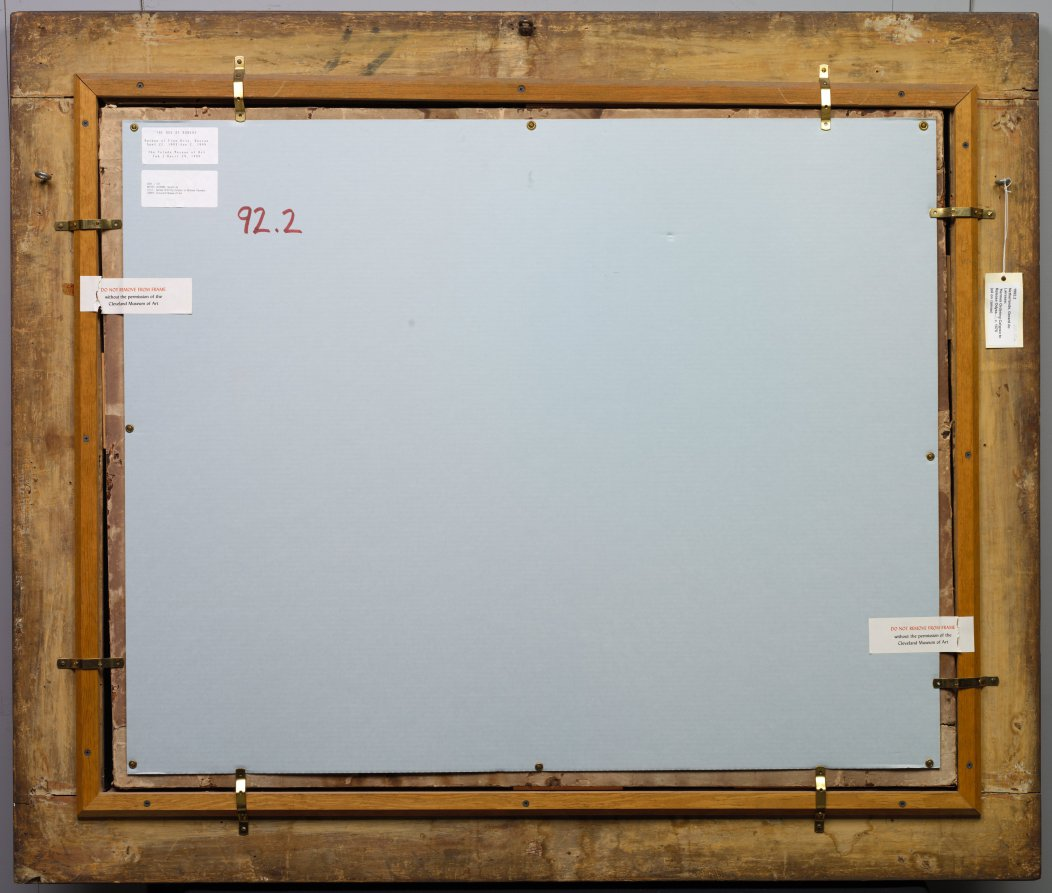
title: Hermes Ordering Calypso to Release Odysseus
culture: Netherlands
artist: Gerard de Lairesse (Flemish, 1641–1711)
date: c. 1670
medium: oil on canvas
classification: Painting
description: The Greek goddess Calypso held the hero Odysseus captive for seven years, preventing his return home from the Trojan War. Despite Calypso’s charms and the luxurious surroundings, Odysseus longed for his home and family, so the Olympian gods finally allowed his freedom. Here, the god Hermes swoops down to free Odysseus from Calypso’s embrace. De Lairesse, popularly known as the “Dutch Poussin,” introduced to the Netherlands a classicizing style influenced by artists of the French Academy.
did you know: Calypso, reclining on her bed, looks at us with the same charming smile she used on Odysseus.